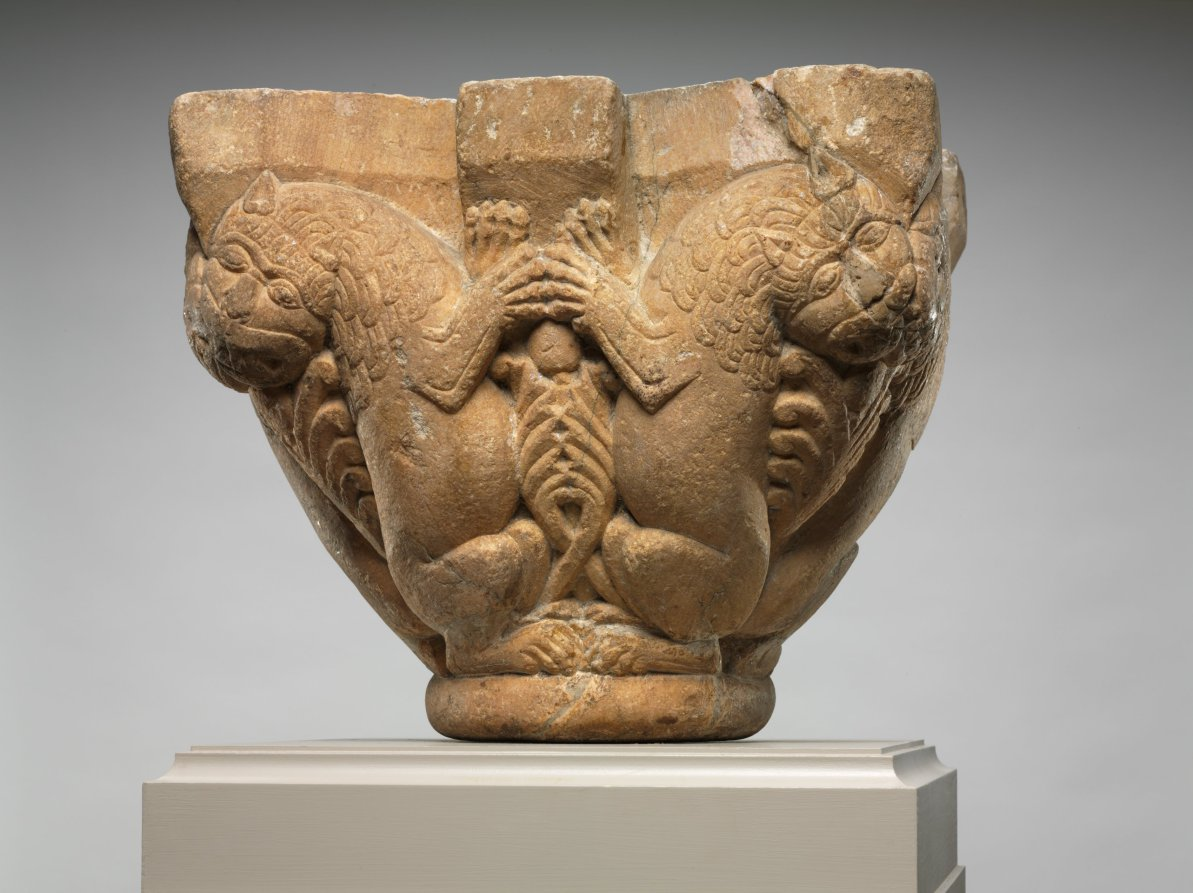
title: Engaged Capital with Lions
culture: Northern Spain (Navarre ?) or Southwest France (Pyrénées or Roussillon ?), mid-12th century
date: 1145–64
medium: marble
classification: Sculpture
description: The compositional motif of confronted and addorsed beasts illustrated on this capital was especially popular in churches along the pilgrimage roads.